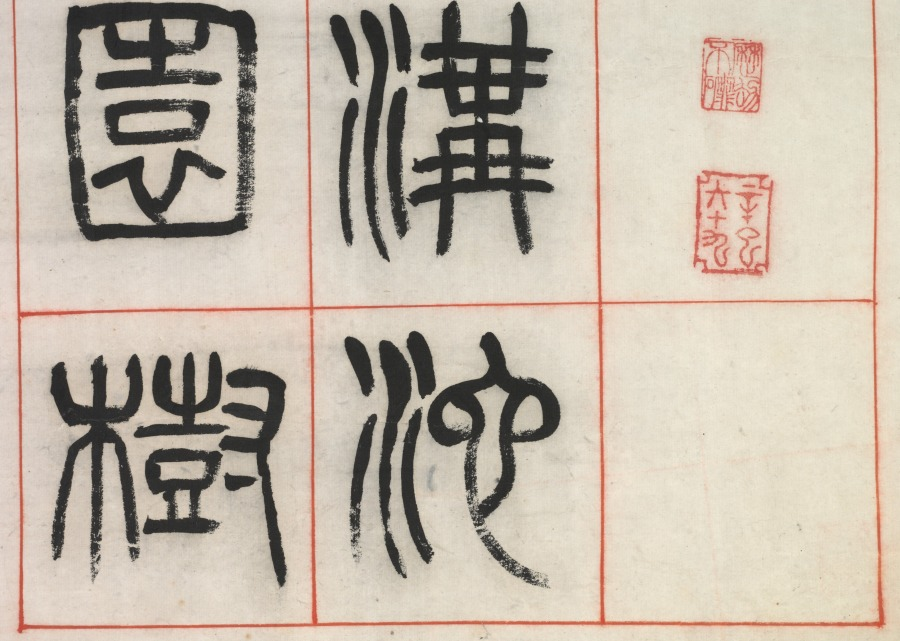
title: On Happiness, Calligraphy in Seal Script Style (zhuanshu)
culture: China, Changsu, Qing dynasty (1644-1911)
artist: Yang Yisun (Chinese, 1813–1881)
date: 1871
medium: hanging scroll, ink on paper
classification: Painting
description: Yang Yisun transcribed this ancient text on six narrow scrolls, starting at the top right and ending at the bottom left. Yang emphasizes the text’s historic nature by using the seal script style found on stone steles and bronze vessels. On Happiness features reflections of a scholar on a leisurely life in the countryside, composed by Han dynasty official Zhongchang Tong, who died the year the Han dynasty collapsed (AD 220). The idyllic life described in the text may bean evocation of the past in a time of national crisis. A decade before Yang wrote these scrolls, Anglo- French forces had looted and burned the Summer Palace in Beijing. At the same time, the domestic Taiping rebellion (1850–64), led by a religious fanatic to overthrow the Qing government, had devastated Yang’s homeland, the Jiangnan region, with an estimated 20 million lives lost.